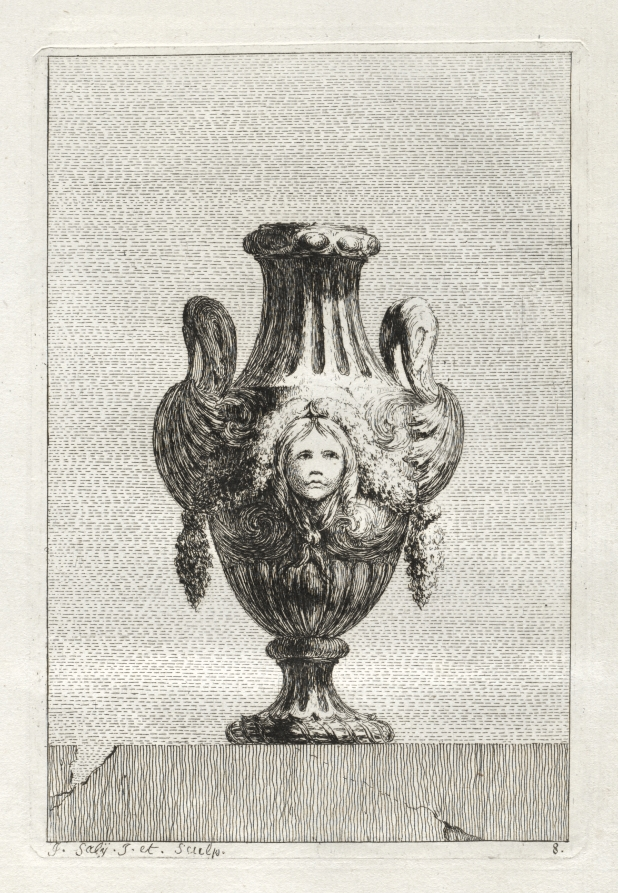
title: Suite of Vases: Plate 8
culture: France, 18th century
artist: Jacques François Saly (French, 1717–1776)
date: 1746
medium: etching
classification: Print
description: Designing ornamental vases or urns was particularly popular during the mid-18th century since the only limit to the possibilities was the imagination of the artist. Saly, a sculptor by training, was a student at the French Academy in Rome from 1740 to 1746, at which time he published a set of 30 etchings. Saly began with basic antique vase forms but deviated from classical ornament to use a rich variety of fantastic creatures for embellishment.